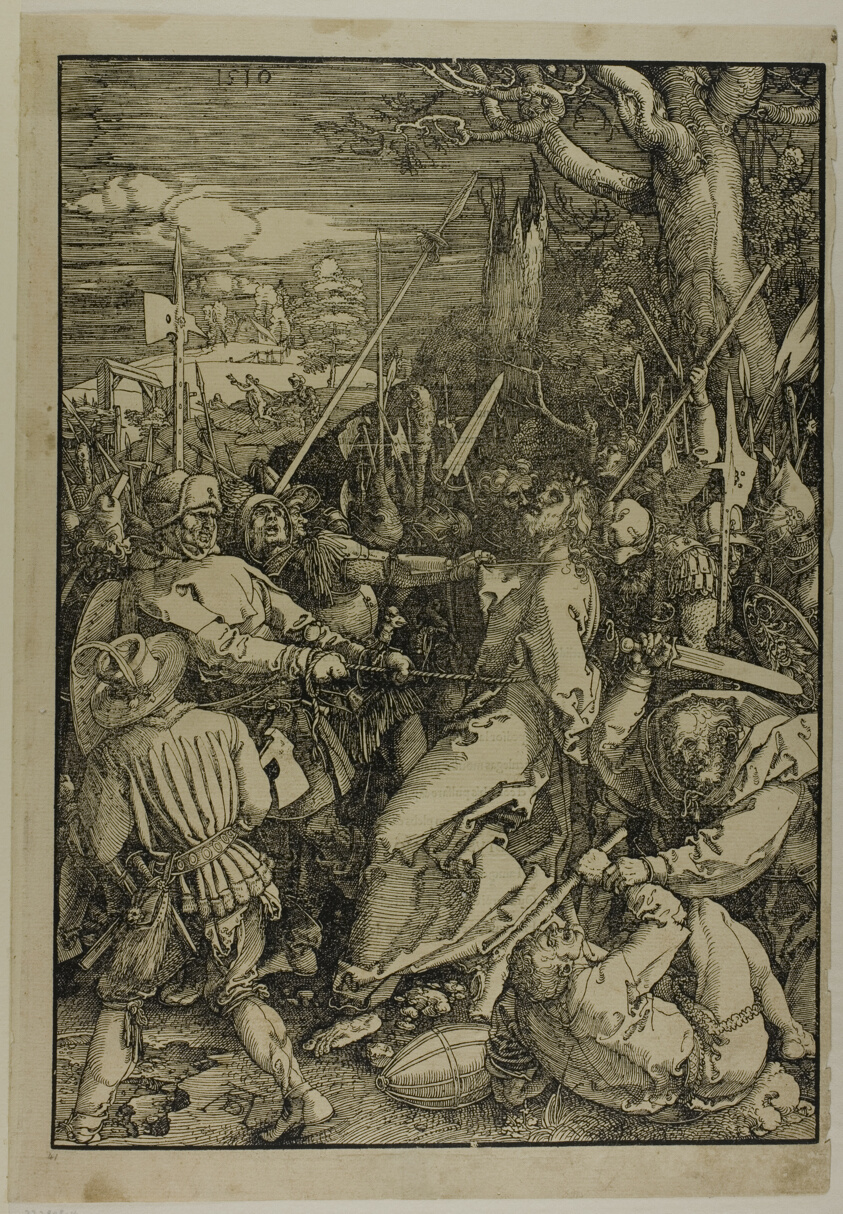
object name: Print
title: The Betrayal of Christ, from The Large Passion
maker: Albrecht Dürer (German, 1471-1528)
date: 1510, published 1511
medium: Woodcut in black on cream laid paper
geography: Germany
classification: woodcut; print; prints and drawing; paper